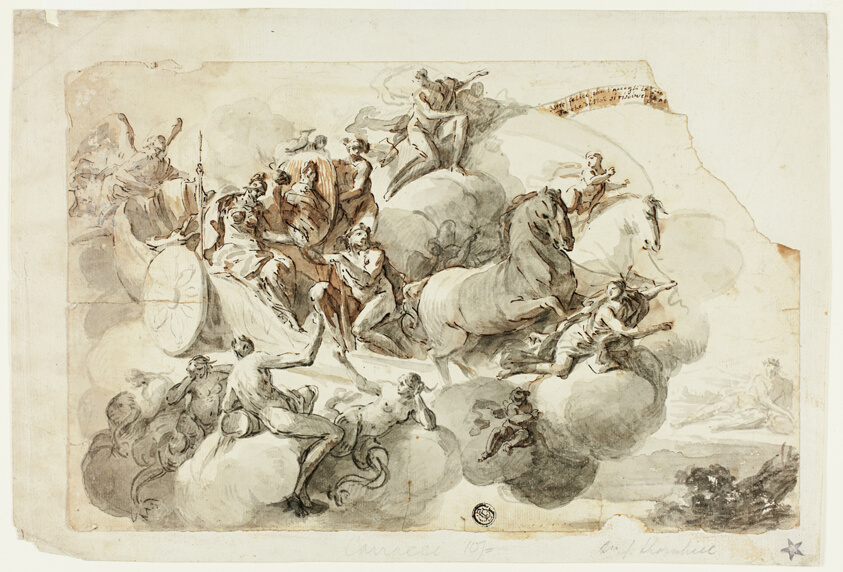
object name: Drawing and Watercolor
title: Apotheosis of a Hero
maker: Domenico Mondo (Italian, 1732-1806); or James Thornhill (English, 1675-1734); or Agostino Carracci (Italian, 1557-1602)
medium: Pen and brown and black ink, with brush and gray and brown wash, over traces of black chalk, on cream laid paper (upper left corner missing), laid down on ivory laid paper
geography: Italy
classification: ink or chalk wash; drawings (visual works); prints and drawing